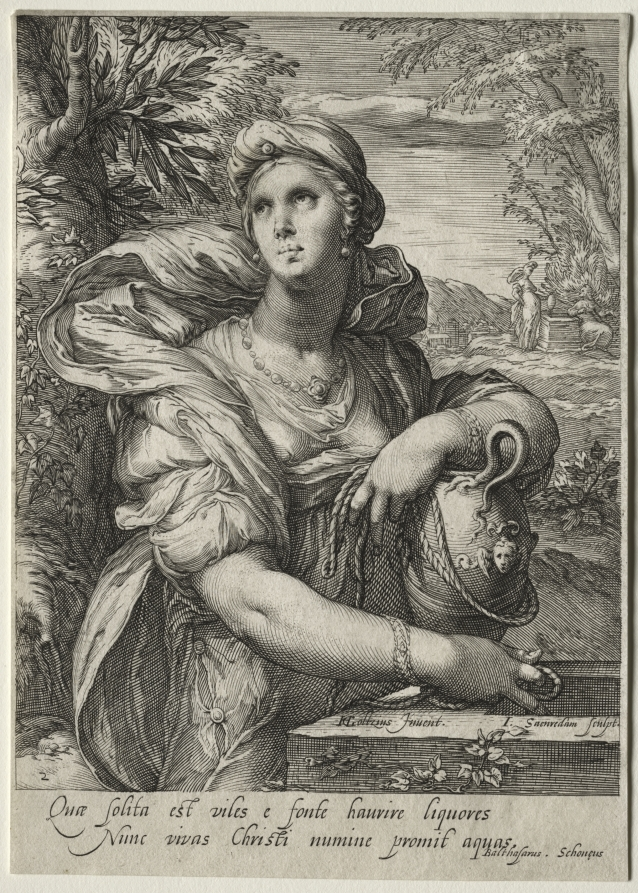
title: Heroines of the New Testament: The Woman of Samaria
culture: Netherlands, 16th century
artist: Jan Saenredam (Dutch, 1565–1607)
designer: after Hendrick Goltzius (Dutch, 1558–1617)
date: c. 1595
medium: engraving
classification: Print